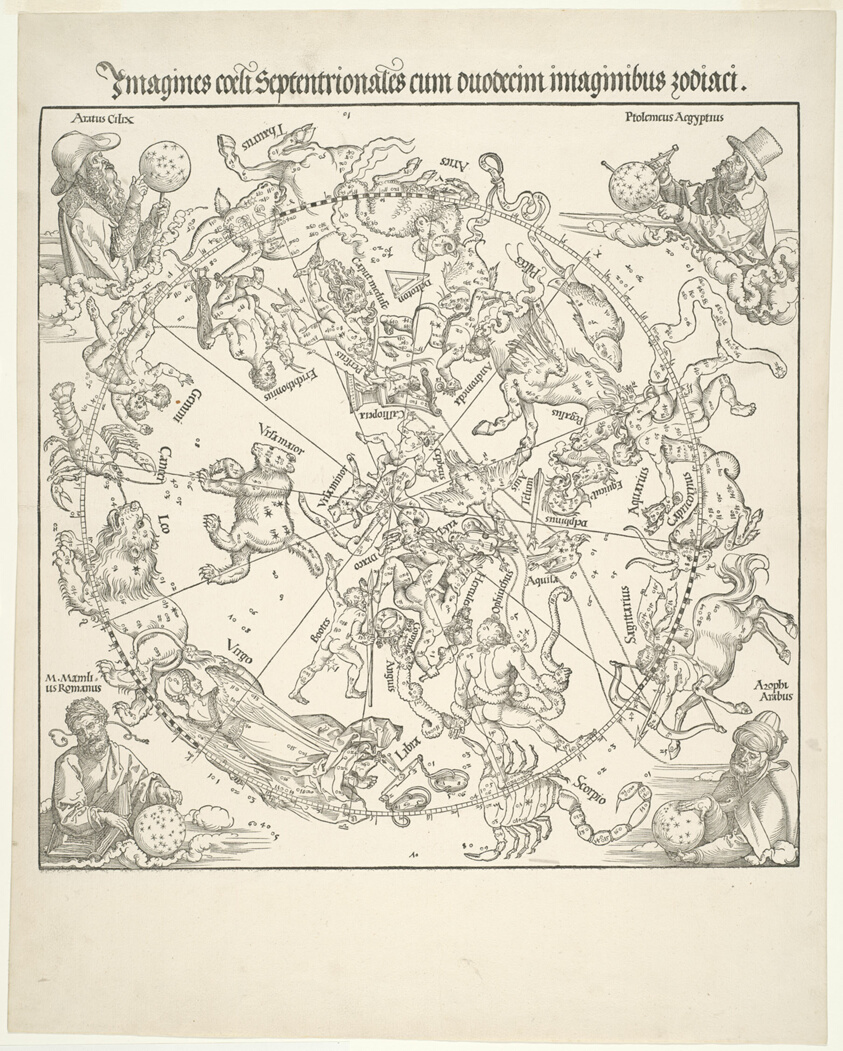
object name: Print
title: Celestial Map of the Northern Sky with the Signs of the Zodiac (Imagines coeli septentrionalis)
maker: Albrecht Dürer (German, 1471-1528)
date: 1515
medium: Woodcut in black on ivory laid paper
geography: Germany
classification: woodcut; print; prints and drawing; paper